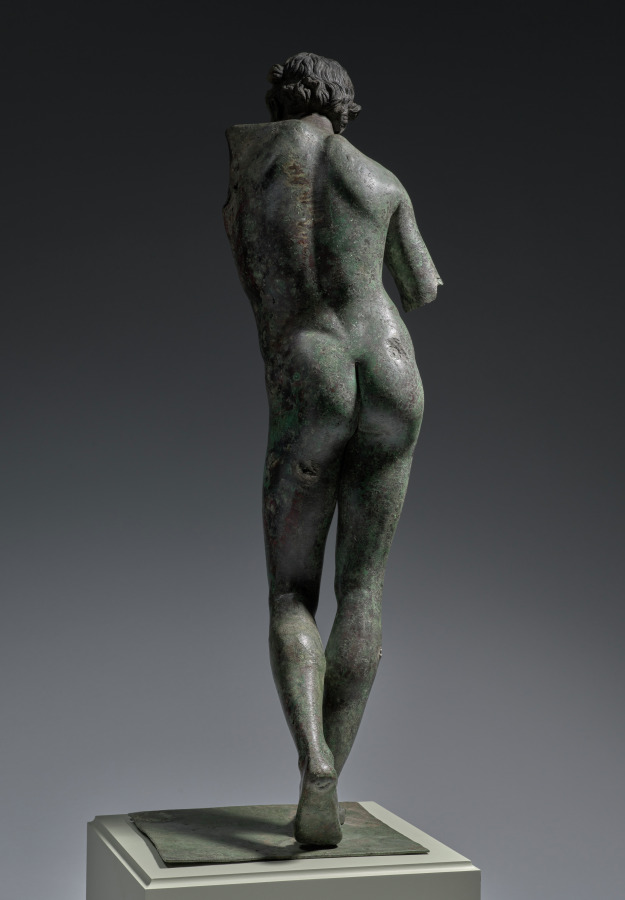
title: The Cleveland Apollo: Apollo Sauroktonos (Lizard-Slayer) or Apollo the Python-Slayer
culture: Greece, Athens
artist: attributed to Praxiteles (Greek, Athenian, c. 400–330 BCE)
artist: or Follower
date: c. 350–200 BCE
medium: bronze, copper, and stone inlay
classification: Sculpture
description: The Cleveland Apollo has been called both Lizard-Slayer (Sauroktonos) and Python-Slayer. The first name comes from the Roman author Pliny the Elder (23–79 CE), who noted in describing bronze works made by the Athenian sculptor Praxiteles (active around 370–330 BCE), “the youthful Apollo [is] known as the Sauroktonos because he is aiming an arrow at a lizard [Greek sauros] which is stealing toward him.” Scholars have long connected this description with artworks showing the young Greek god Apollo in a distinctive pose and hairstyle, standing on his right leg and leaning to his left. In more completely preserved versions, Apollo reaches toward a tree with his left arm and seems to take aim at a lizard. The Cleveland Apollo shows the adolescent god similarly posed and coiffed, making it an important addition to the Apollo Sauroktonos group—the only surviving large-scale bronze sculpture of the type. The young Greek god Apollo, identifiable by his distinctive hairstyle and pose, stands on his right leg and leans to his left, probably toward a now-lost tree. Although now separated, the left forearm and hand survive, together with an unusual lizard-like creature, perhaps drawn from the world of myth. A flat bronze base also remains, though it may be a later adaptation. A tree or other support has been lost, probably smaller than in the marble versions. Given its material and very high artistic quality—note the lifelike hair, fingernails, and inlaid copper lips and nipples—more than one scholar has suggested that the Cleveland Apollo could be the very sculpture seen by Pliny. Some have called the sculpture “Python-Slayer,” seeing the oddly shaped serpentine creature with asymmetrical legs as the mythical Python killed by Apollo in establishing his sanctuary at Delphi. But technical details may explain some of the asymmetry, and no other specific evidence connects it to Delphi. Most scholars would retain the name Sauroktonos (Lizard-Slayer) for the Cleveland Apollo, even as some debate whether it was made by Praxiteles himself or a later follower.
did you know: The Cleveland Apollo is the only surviving large-scale bronze sculpture of its type, Apollo Sauroktonos (the Lizard-Slayer).